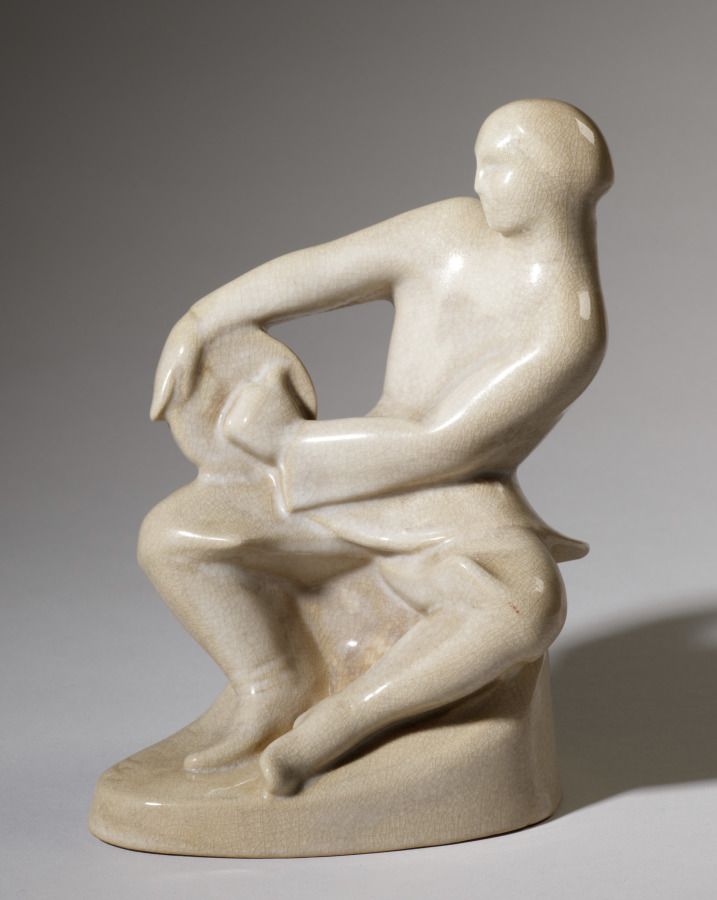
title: Tambourine Player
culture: America, Ohio, Cleveland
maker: Cowan Pottery Studio (America, Rocky River, Ohio, 1920–1931)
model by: Alexander Blazys (American, born Russian Empire [now Lithuania], 1894–1963)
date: 1927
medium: mold-made ceramic, glazed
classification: Ceramic